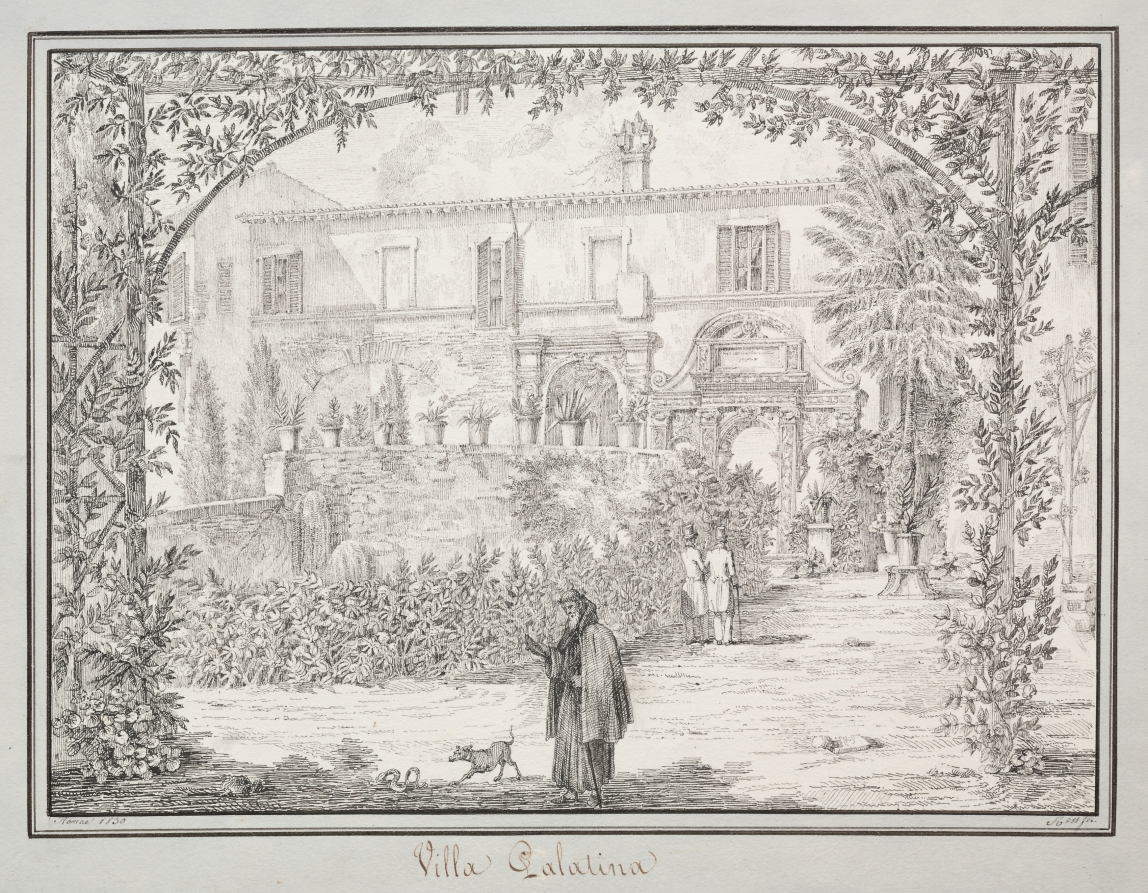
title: Villa Palatina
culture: Germany, 19th century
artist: Peter Heinrich Lambert von Hess (German, 1792–1871)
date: 1830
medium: pen and black ink with faint traces of graphite; framing lines in black ink, with gray wash border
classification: Drawing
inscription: signed, lower right, in gray ink: Hess fec. ; by artist, lower left, in gray ink: Romae 1830 ; [by artist?], lower center, in brown ink: Villa Palatina ; VERSO, upper center, in graphite: 39 x 32.5 [underlined] / 29 x 22.5 / 2 RIGHE